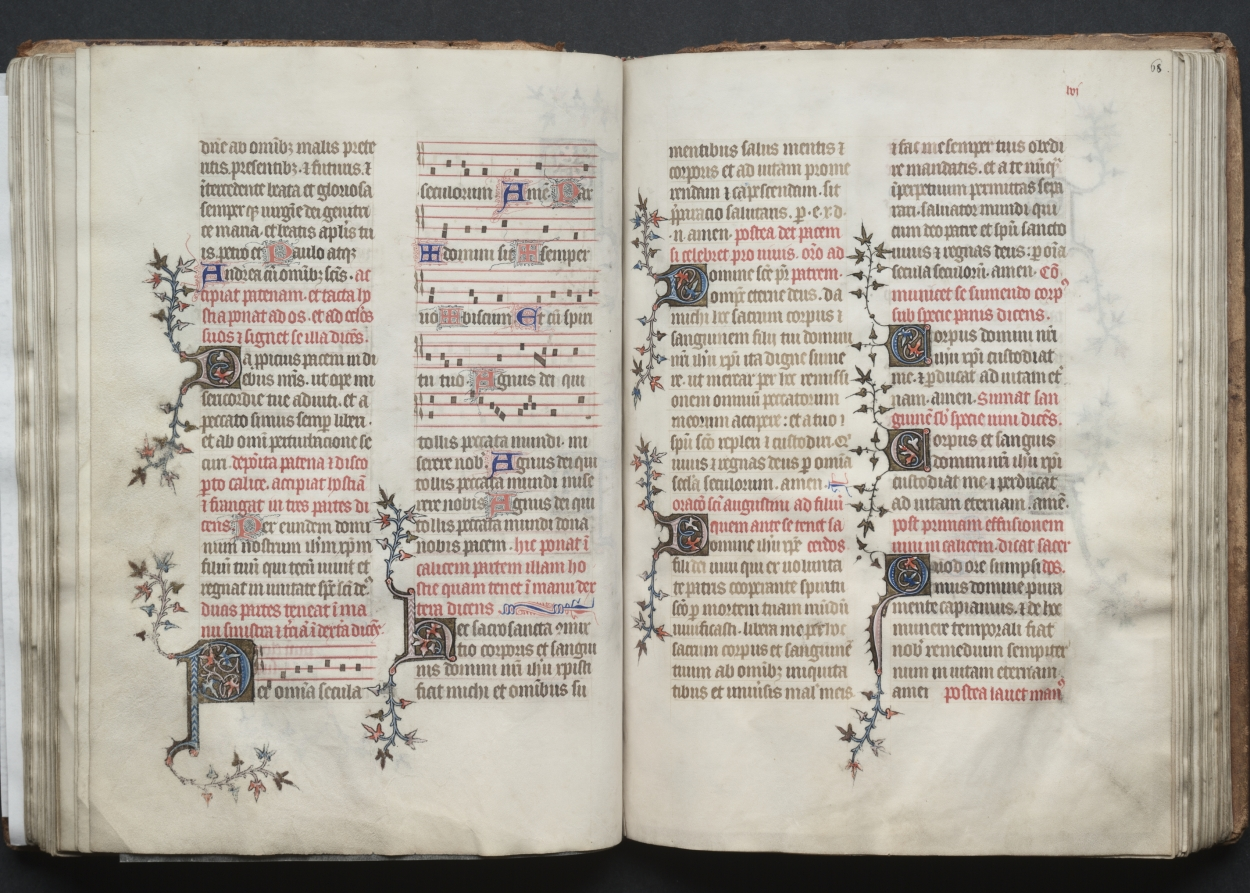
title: The Gotha Missal: Fol. 68r, Text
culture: France, Paris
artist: Master of the Boqueteaux (French)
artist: and Workshop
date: c. 1375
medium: ink, tempera, and gold on vellum; blind-tooled leather binding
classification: Bound Volume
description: The style and quality of this manuscript's decoration is typical of deluxe Parisian books made for aristocratic or royal patrons. Most of the book's decoration appears to be the work of the Master of the Boqueteaux, an artist active at the court of King Charles V (died 1380). His style was apparently shared by a number of book illuminators working in and around Paris. It is very possible that the Gotha Missal belonged to Charles V, but is not provable because the manuscript has no royal portraits and lacks a colophon. Given the book's magnificent decoration, however, it would seem that it was produced for a Valois prince, if not for the king himself. The manuscript receives its name from the German dukes of Gotha, its later owners.